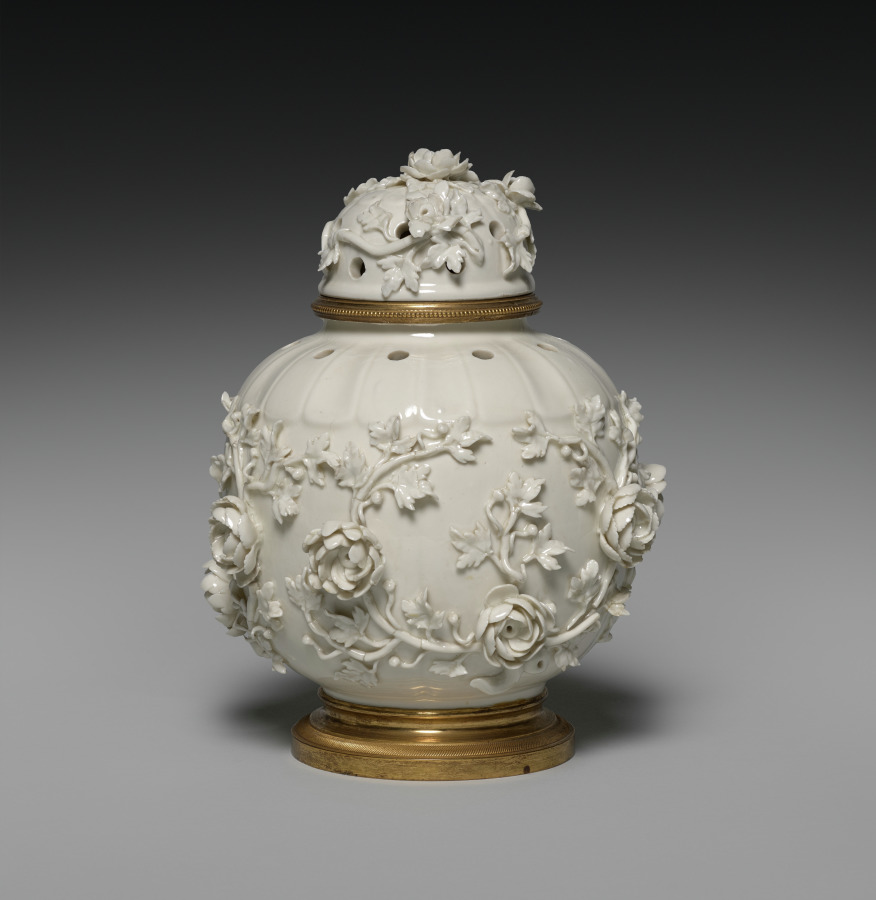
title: Potpourri Vase with Cover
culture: France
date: c. 1860–80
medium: blanc-de-chine porcelain; gilt bronze mount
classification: Ceramic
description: This vase was likely made by the celebrated Parisian ceramics firm of Edmé Samson (1810-91). To cater to the resurgence in taste for 18th-century designs, the Samson firm specialized in making reproductions of rare 18th-century European porcelains, especially those from firms that had already copied Chinese porcelains. In this case, this vase's design is taken from models produced by the St. Cloud factory in the 1750s after earlier Qing dynasty Chinese ceramics. However, the telltale sign that this vase is made by Samson and not St. Cloud is that the original would have been made from a soft-paste porcelain (fired at a lower temperature), while this example is made of hard-paste porcelain (fired at the highest temperature).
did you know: Potpourri vases always have holes in the top to let the scent of dried spices and flowers contained within freshen the air around them.